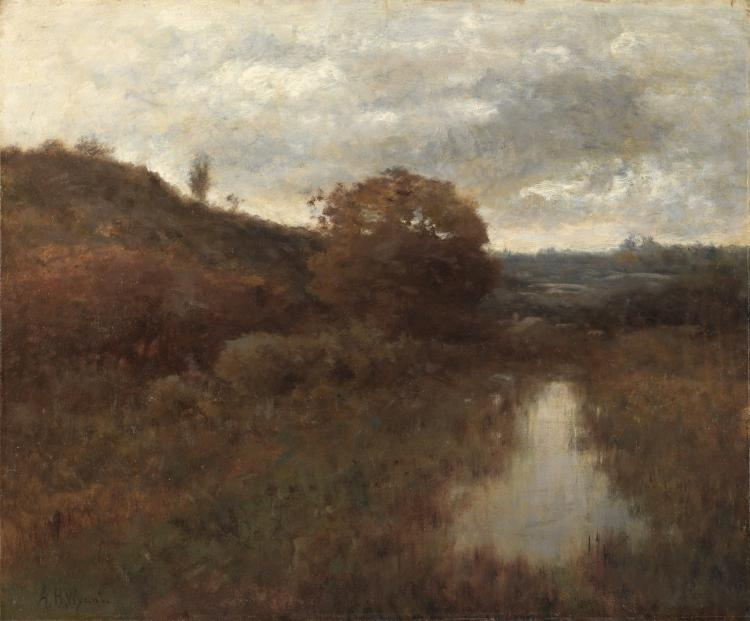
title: Autumn Landscape and Pool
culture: America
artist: Alexander H. Wyant (American, 1836–1892)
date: 1870s-1880s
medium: oil on canvas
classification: Painting